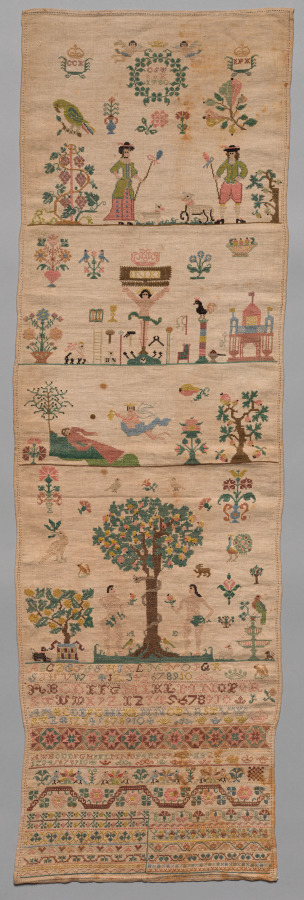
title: Long Sampler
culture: Germany, late 18th century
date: 1780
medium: embroidery; silk on linen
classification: Sampler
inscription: in first panel, wreath with initials: "C.S.T./ I.P.K./ 1780," on left: "C.C.K," on right: "I.P.K."; in fifth panel, rows of alphabet and numerals.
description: Samplers were created as a mark of achievement in needlework by young ladies as they progressed in their education. Because they display levels of skill and technique, samplers often include figurative or scenic decoration along with the alphabet and various horizontal and vertical patterns that could serve as guides for future stitching. Most samplers reveal the pride of a young lady as she showed off her considerable accomplishment in sewing and were treasured from generation to generation.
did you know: This unusually long sampler depicts scenes from the biblical Old Testament, including Eve tempting Adam with an apple.